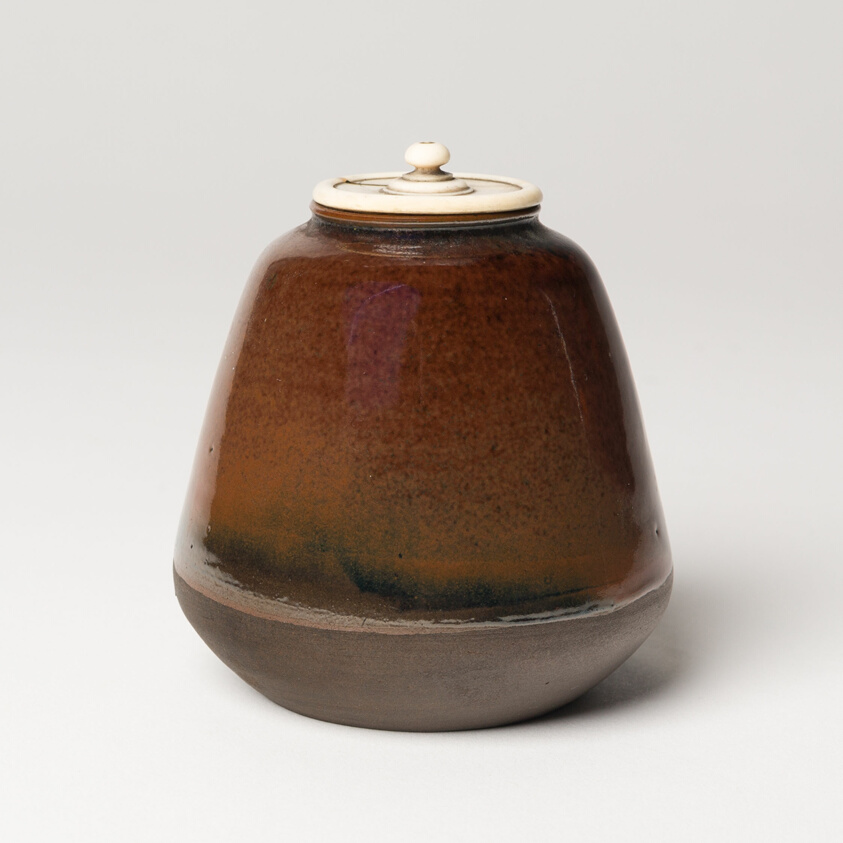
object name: Vessel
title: Tea Caddy (Cha-ire)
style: Japanese (culture or style)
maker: Japan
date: 19th century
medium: Glazed stoneware; ivory lid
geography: Japan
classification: porcelain; asian art; ceramics; vessel